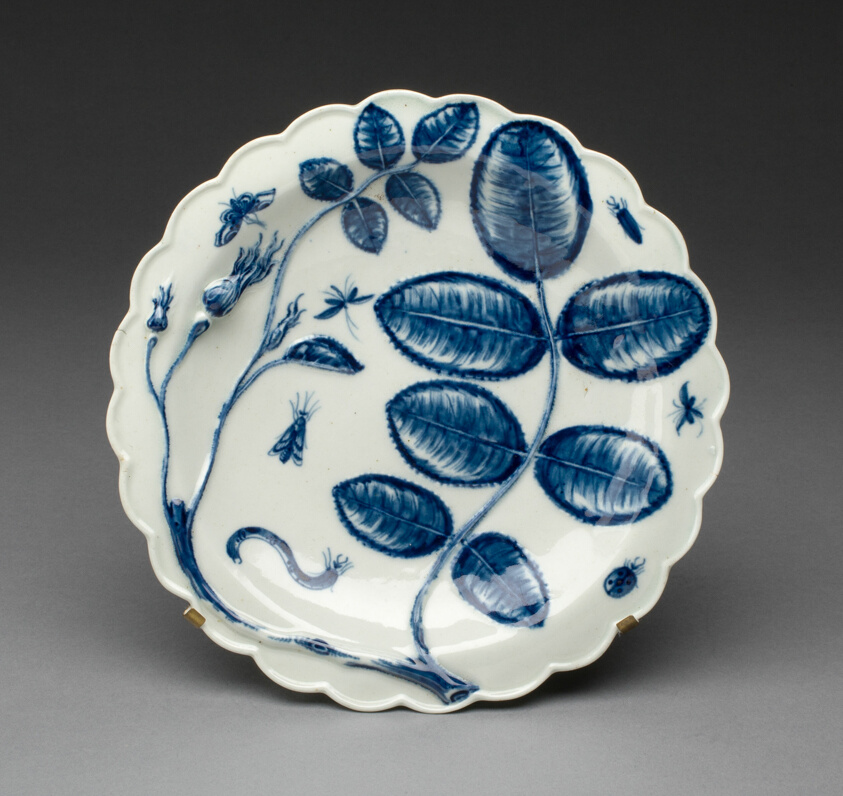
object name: Ceramics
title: Plate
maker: Worcester Porcelain Factory (Warmstry House Period, 1751–1783); Worcester, England, founded 1751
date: c. 1765/70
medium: Soft-paste porcelain, underglaze blue decoration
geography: Worcester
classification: plate (general, dish); porcelain; dish (vessel); ceramics; european decorative arts